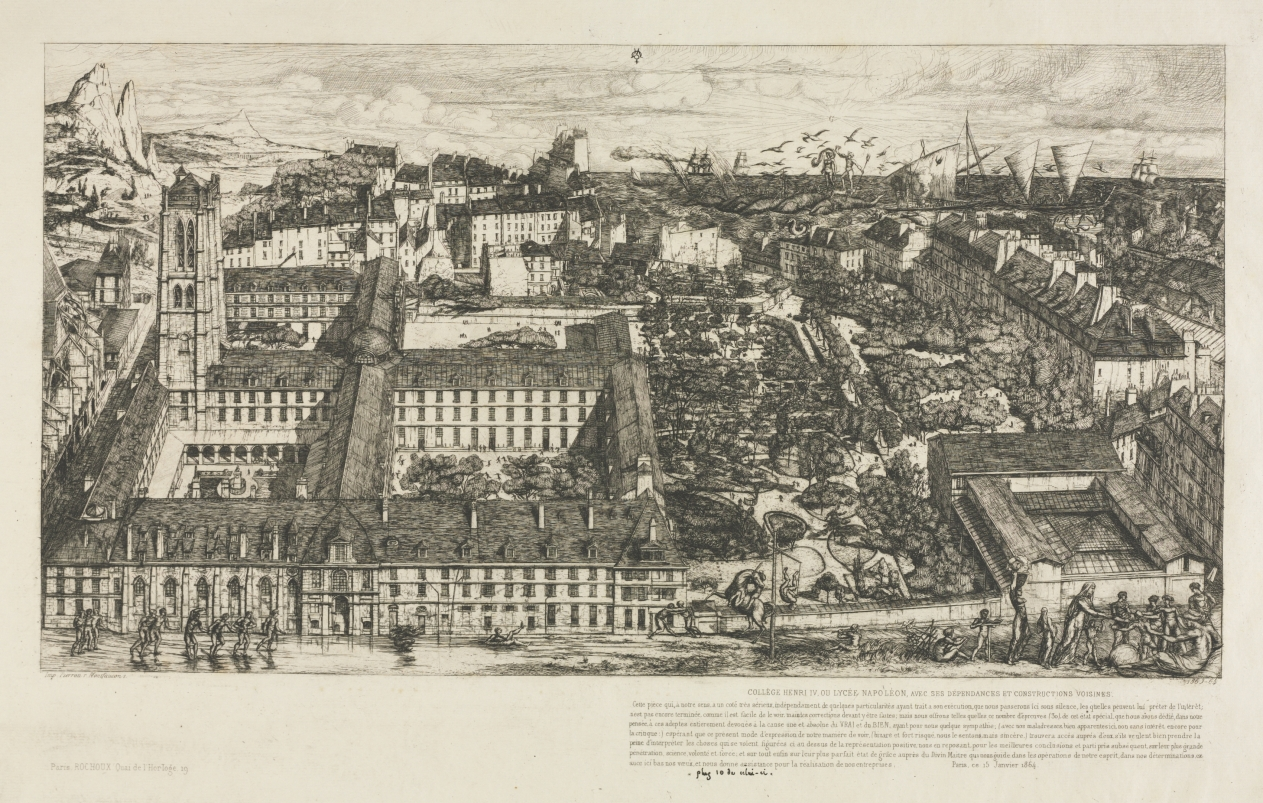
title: Henry IV College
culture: France, 19th century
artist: Charles Meryon (French, 1821–1868)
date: 1863–1864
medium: etching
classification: Print